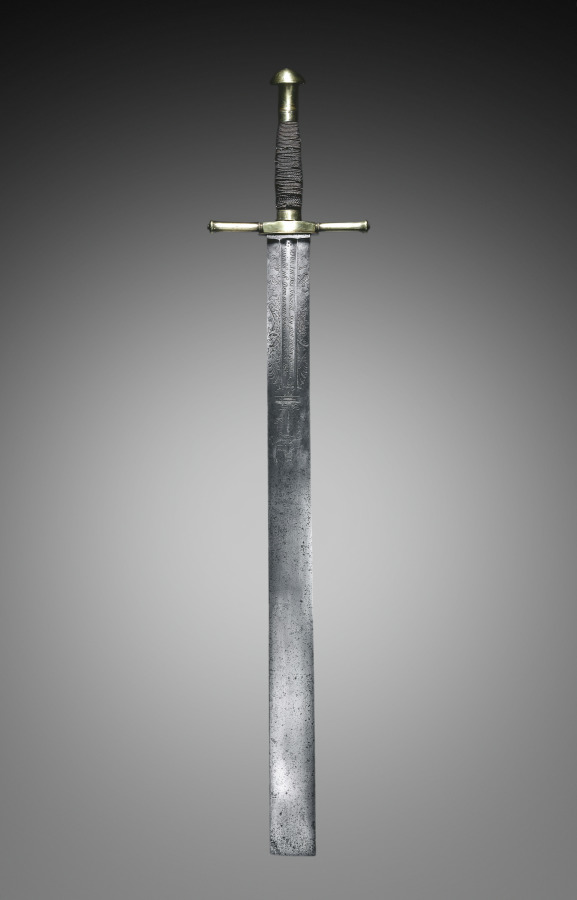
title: Executioner's Sword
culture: Germany, late 17th Century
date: late 1600s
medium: steel, wood, brass and copper wire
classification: Arms and Armor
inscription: Wan ich Das Schwerdt thu auff heben so / Wunch ich Dem armen sunder das Ewege Leben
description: Execution by decapitation was generally reserved for the nobility during the Middle Ages and Renaissance. Although the axe was favored in England, for centuries swords were used throughout Central Europe. The blades were often etched with moralizing inscriptions and designs representing Justice (as here), the gallows, the rack, or the Crucifixion. By the early 1700s swords were no longer primarily used in Europe for executions, but they still functioned as symbols of power. This sword was probably ceremonial for a formal procedure or procession.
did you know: The inscription on this sword reads, "When I raise this sword, so I wish that this poor sinner will receive eternal life."